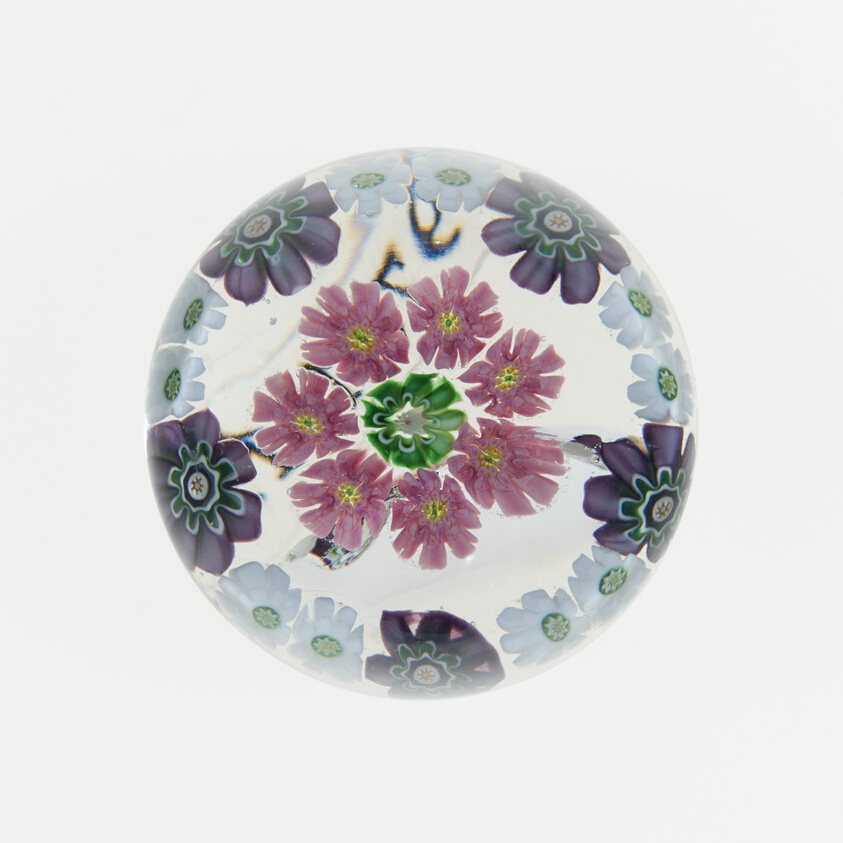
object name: Glass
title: Paperweight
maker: Clichy Glassworks (Cristalleries de Clichy); Clichy, France, 1837-1885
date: 19th century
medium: Glass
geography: Clichy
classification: paperweight; millefiori; european decorative arts; glass